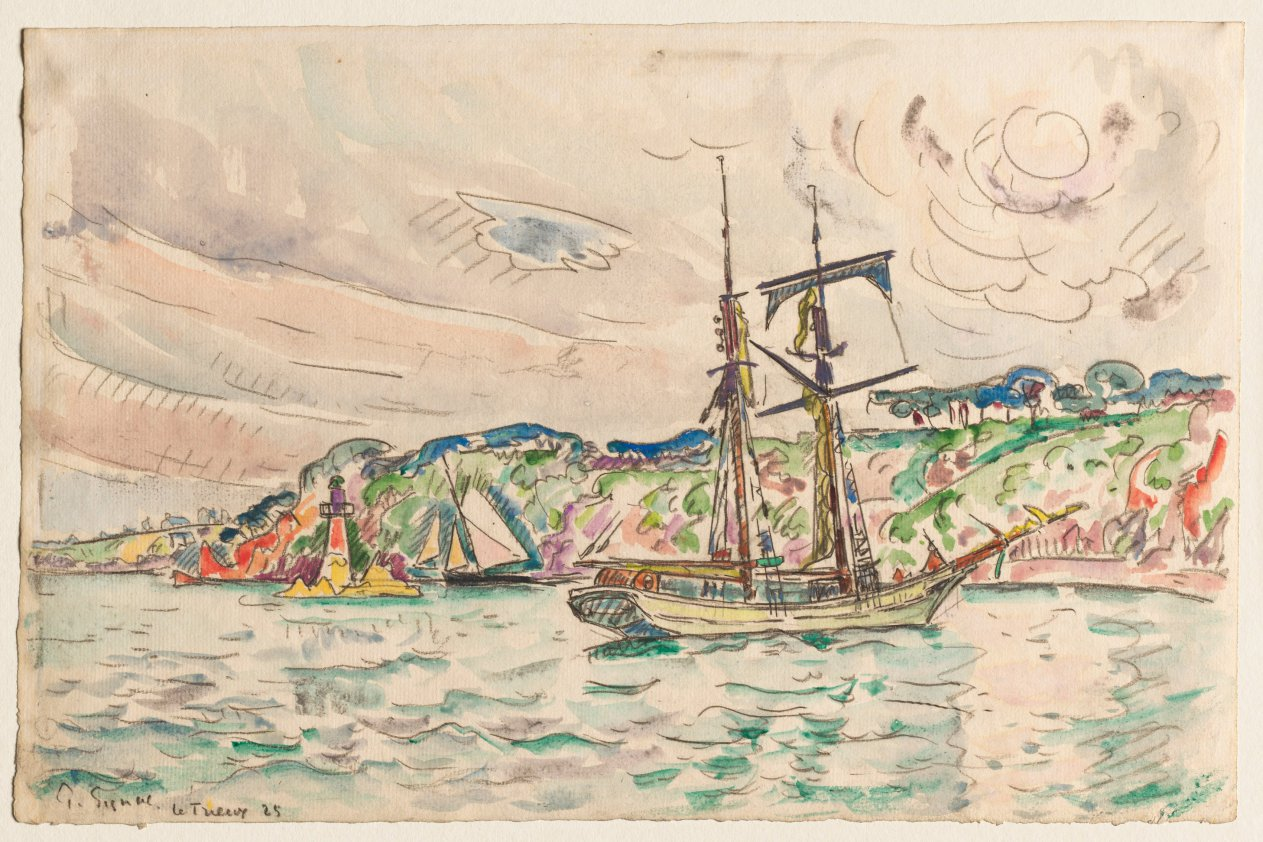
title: Ships near the Trieux River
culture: France, 20th century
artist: Paul Signac (French, 1863–1935)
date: 1925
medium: black crayon and watercolor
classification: Drawing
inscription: signed, lower left, in black crayon: P. Signac. Le Trieux 25 ; VERSO, upper right, in graphite: nº 8 ; upper right, in graphite: ouverture / 45 x 29